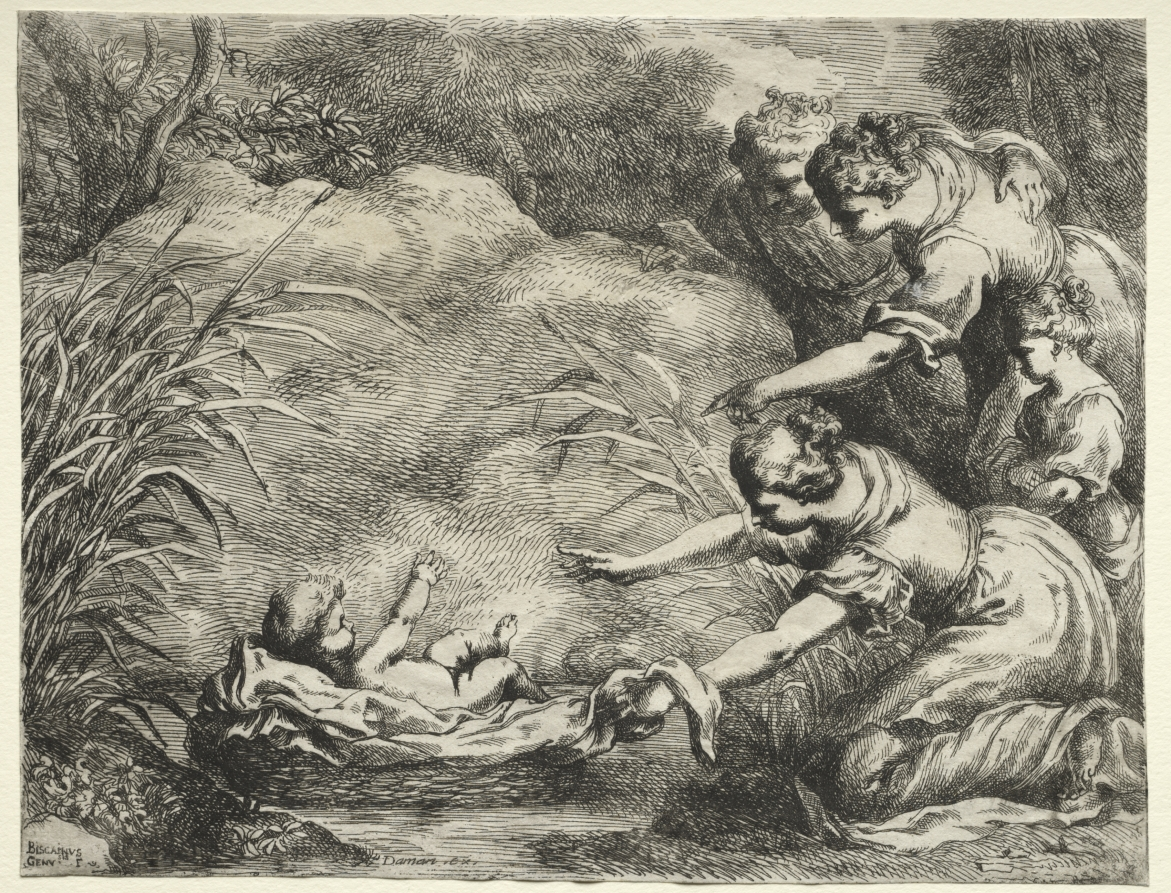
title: Moses Saved from the Nile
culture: Italy, 17th century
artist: Bartolomeo Biscaino (Italian, 1632–1657)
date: 1650–57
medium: etching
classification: Print